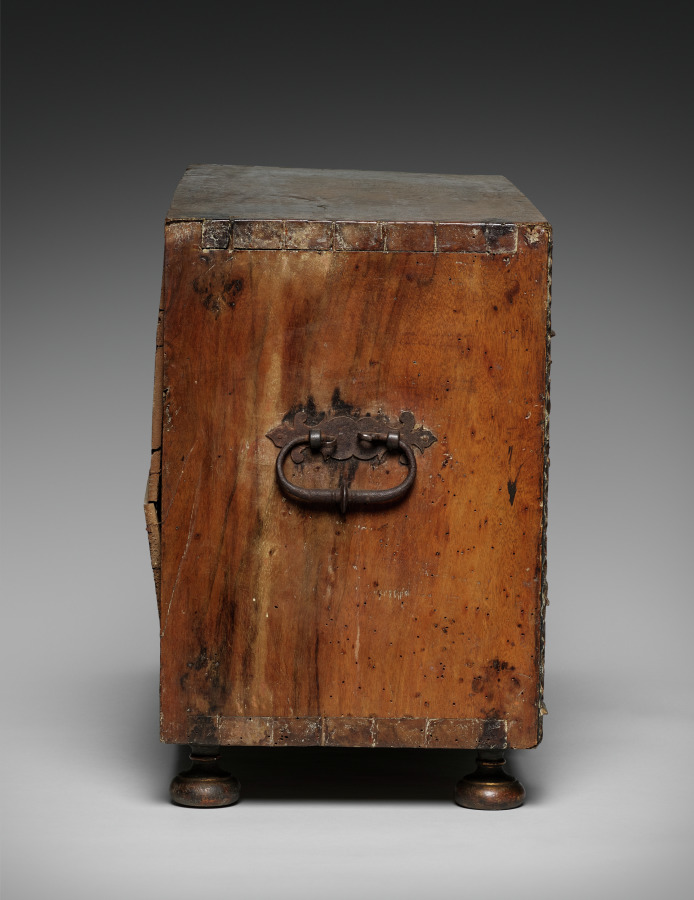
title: Chest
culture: Spain, Colonial, late 17th Century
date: late 1600s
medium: turned and joined wood, gilded and painted red with applied bone columns and bone inlays, wrought iron hardward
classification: Furniture and woodwork